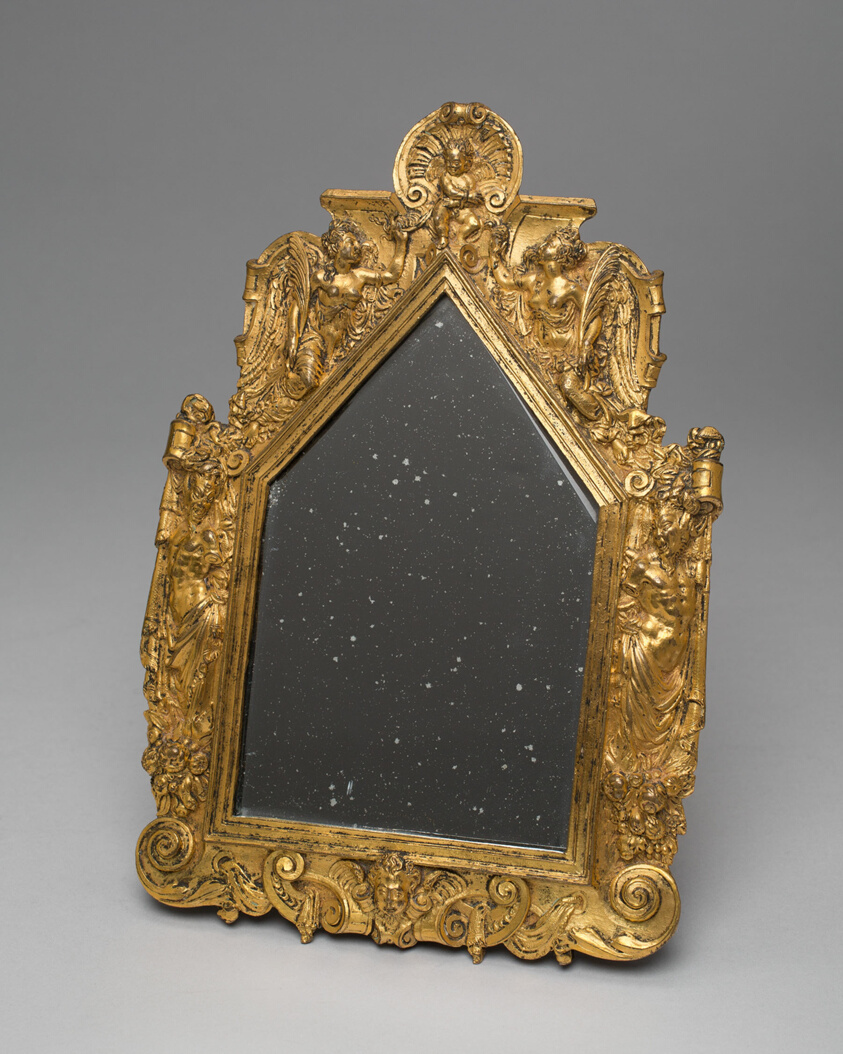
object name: Decorative Arts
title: Mirror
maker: French; Probably Paris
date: c. 1560-c. 1570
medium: Gilt bronze and mirrored glass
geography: Paris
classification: bronze; metalwork; european decorative arts; decorative arts